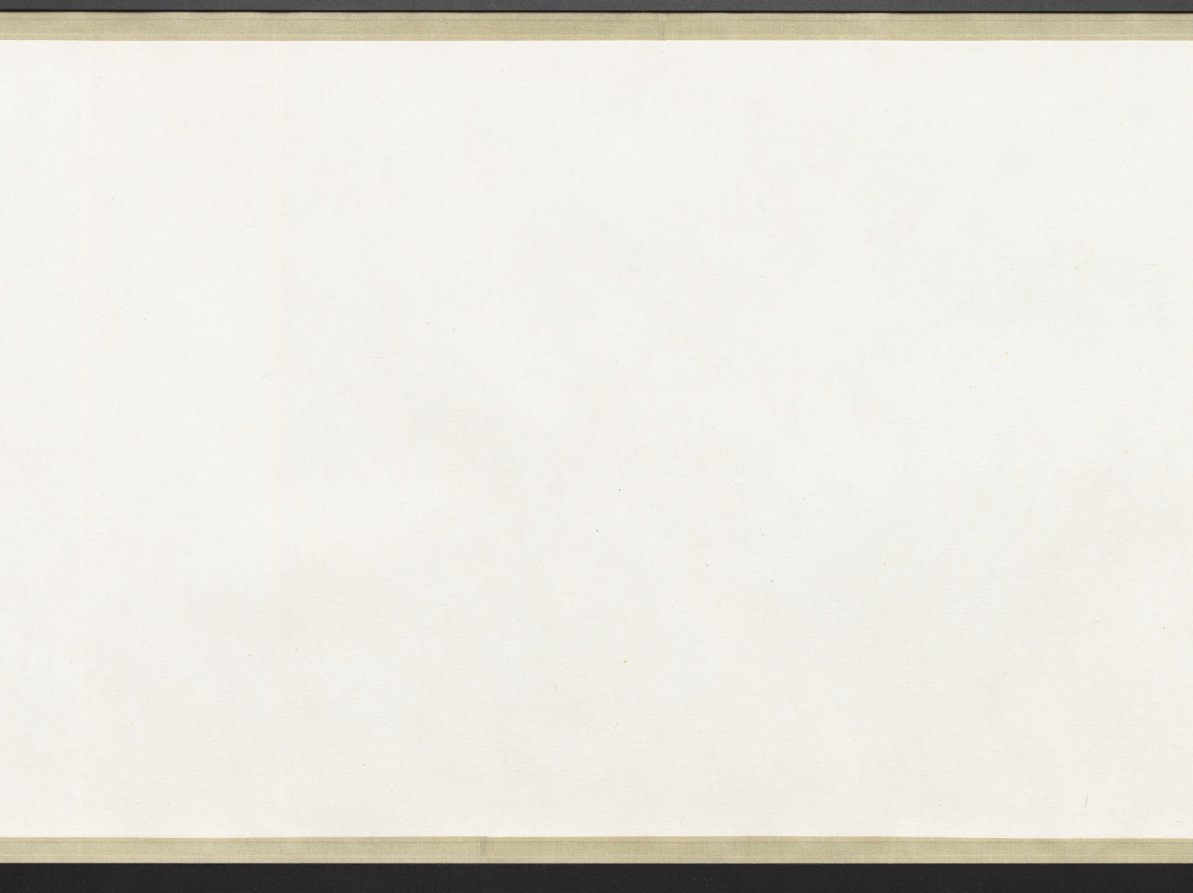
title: A Hundred Sparrows in a Lofty Grove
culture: China, Ming dynasty (1368–1644)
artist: attributed to Lin Liang (Chinese, 1416–1480)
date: 1368–1644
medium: handscroll; ink on silk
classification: Painting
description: Sparrows engaged in all kinds of activities frolic amid leafy branches, blades of grass, rocks, and a waterfall. As our eyes move over the scroll, the artist engages us in enjoying the sparrows’ carefree movements in a natural setting. The charming birds were painted from close observation in swift and fluent brushstrokes. Sparrows are a common bird and in Chinese painting they often represent the commoner in human society as opposed to the noble pheasant or peacock representative of the ruling class.